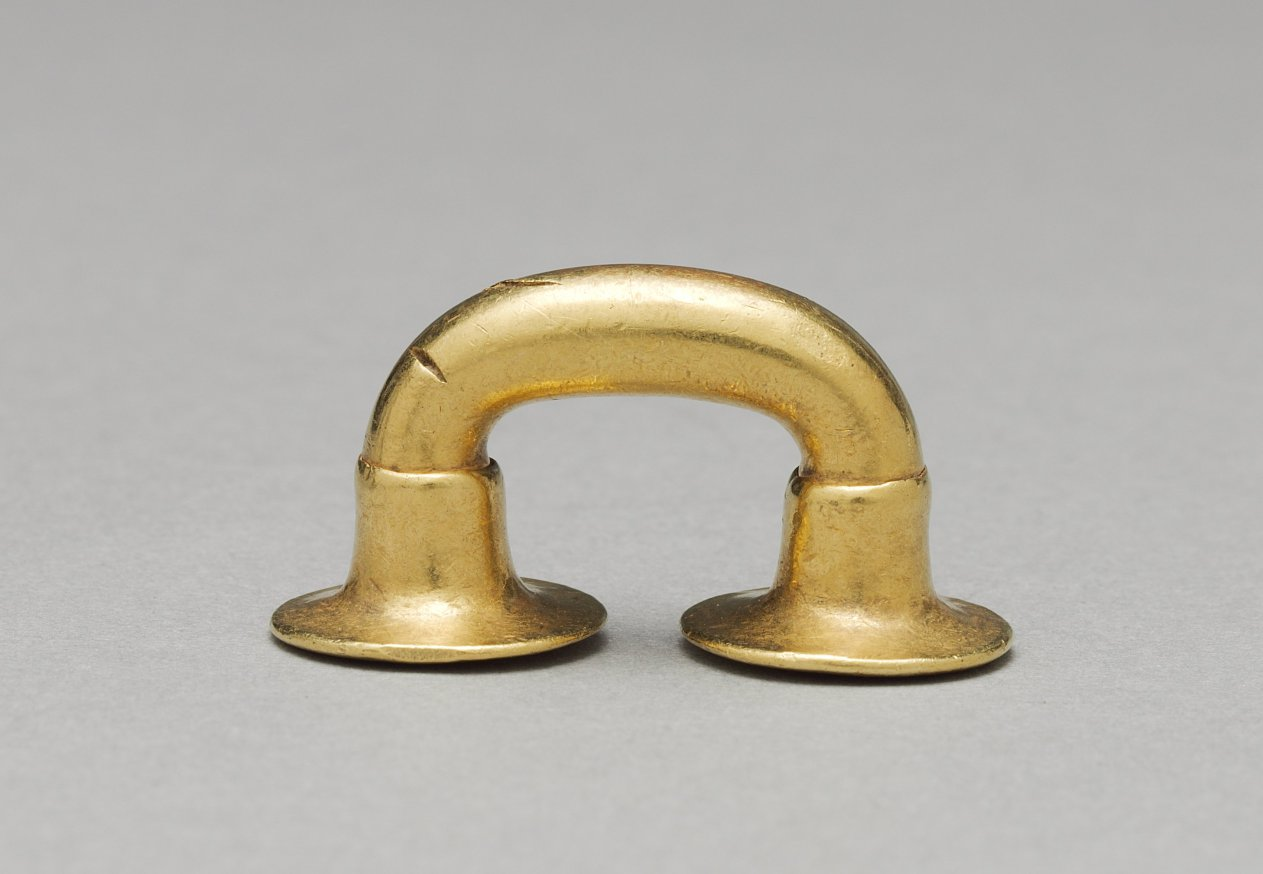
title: Nose Ornament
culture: Colombia, Sinú style, 5th-11th century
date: c. 400–1000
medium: hammered gold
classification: Jewelry